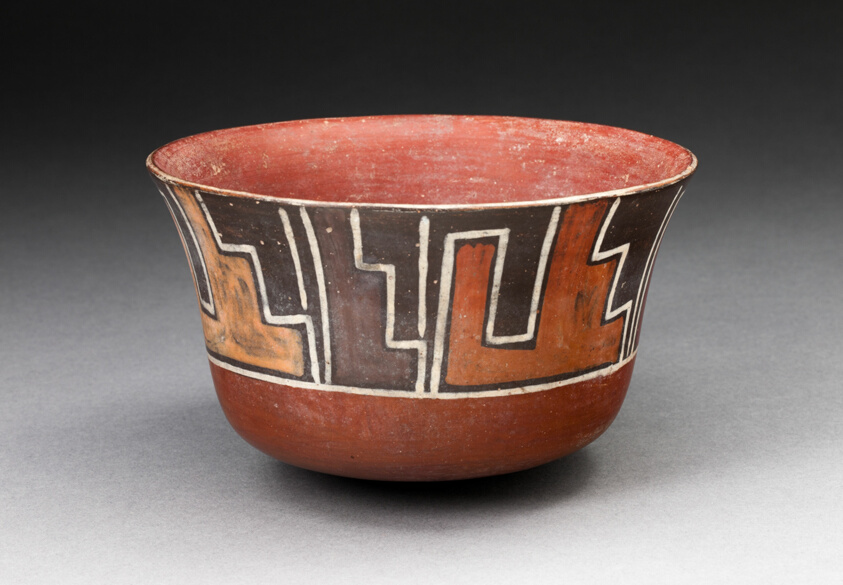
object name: Vessel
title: Bowl with Stepped Motifs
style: nazca, early intermediate period, Pre-Columbian, americas, Arts of the Americas, andean, andes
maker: Nazca; South coast, Peru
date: 180 BCE–500 CE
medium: Ceramic and pigment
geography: Nazca Valley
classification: bowl; earthenware; art of the americas; ceramics; vessel